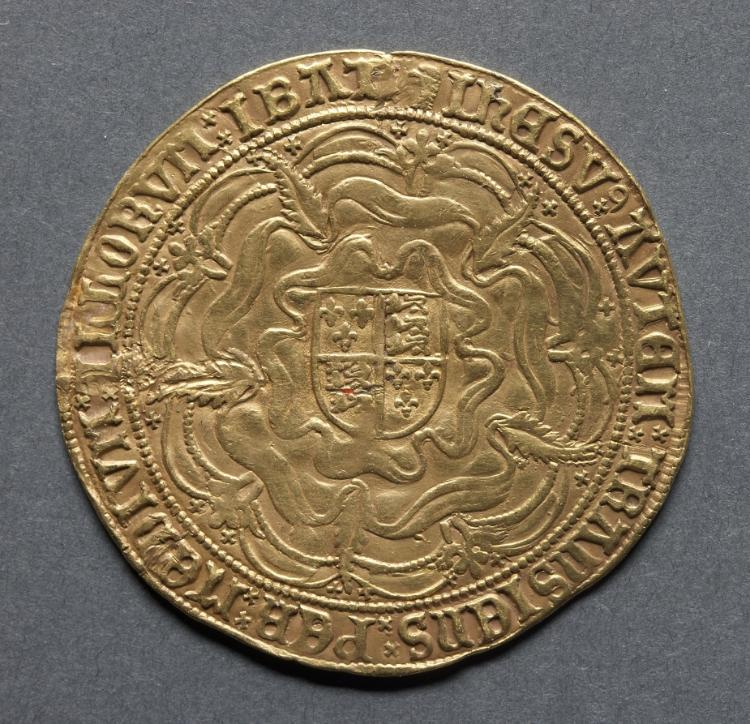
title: Sovereign of Thirty Shillings: Shield of Royal Arms on Rose (reverse)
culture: England, Edward VI, 1547-1553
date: 1550–1553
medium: gold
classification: Coins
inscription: IHESV AVTEM TRANSIENS PER MEDIVM ILLOVM IBAT